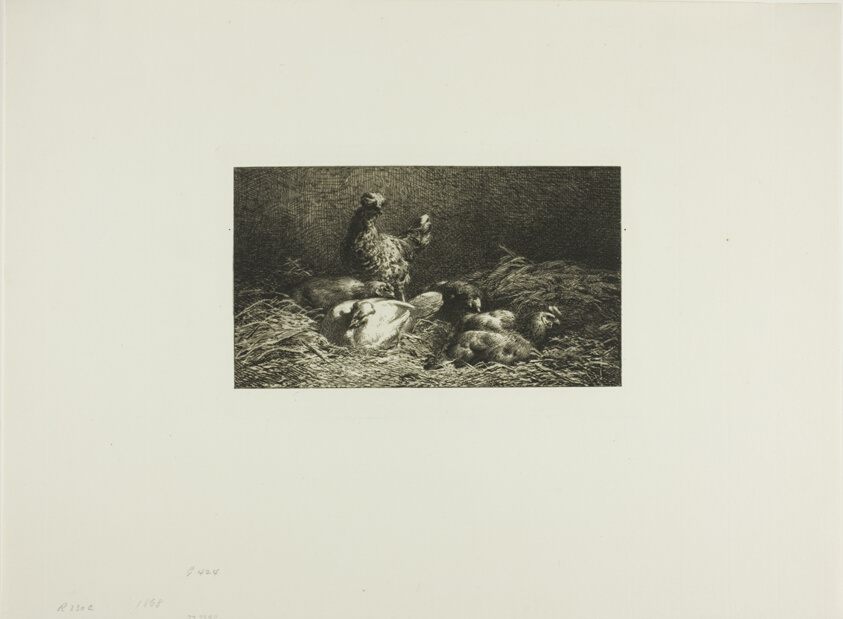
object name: Print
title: Chickens in Their Roost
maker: Charles Émile Jacque (French, 1813-1894)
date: 1864–1866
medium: Etching, roulette, and scraping on paper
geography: France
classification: etching; print; prints and drawing